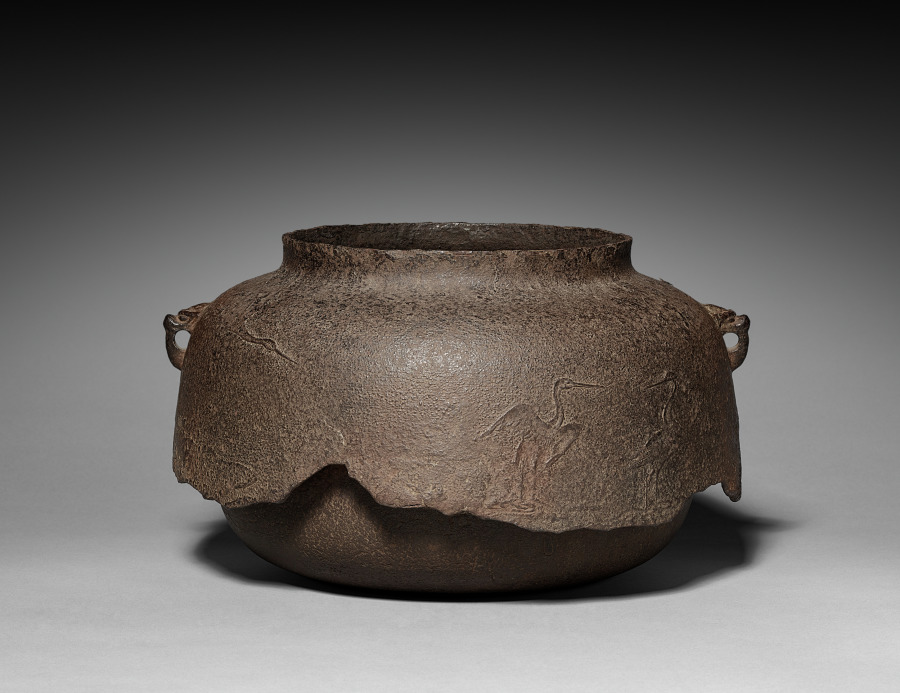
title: Kettle with Crane Design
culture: Japan, Muromachi period (1392–1573)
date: 1392–1573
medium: iron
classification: Metalwork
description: Water supplied from a jar such as the fine Shino-ware vessel (CMA 1972.9.a-b) was transferred to an iron kettle for boiling as part of the tea ceremony. Former CMA director Sherman Lee described the jagged, broken skirt of this kettle as "attractively damaged," complementing the unobtrusive wispy designs on its rough metal surface. The character of this kettle—worn, coarse, the "perfection" of symmetry destroyed—was cherished by tea masters for its powerful humility.